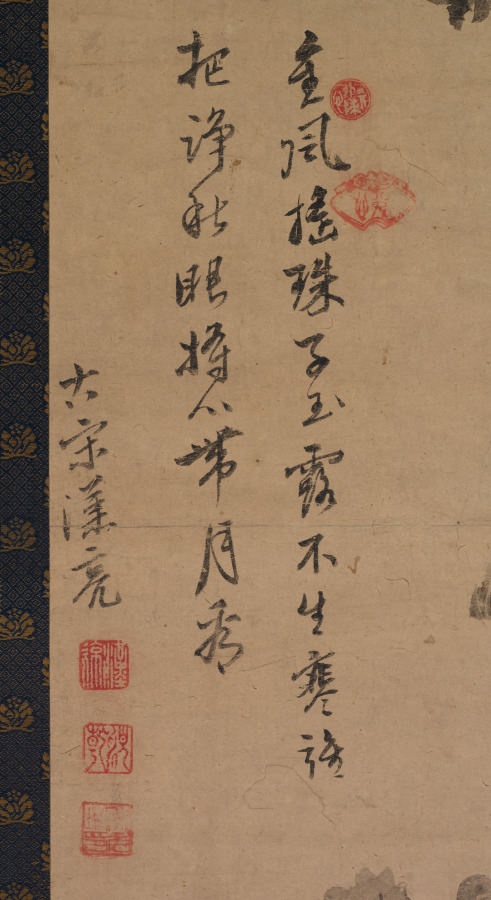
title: Grapevine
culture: China, Qing dynasty (1644–1911)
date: 1700s–1800s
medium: hanging scroll; ink on paper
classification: Painting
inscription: Two-line calligraphic inscription with signature. 5 unidentified seals.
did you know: Clusters of grapes can represent both abundant wealth and numerous offspring.